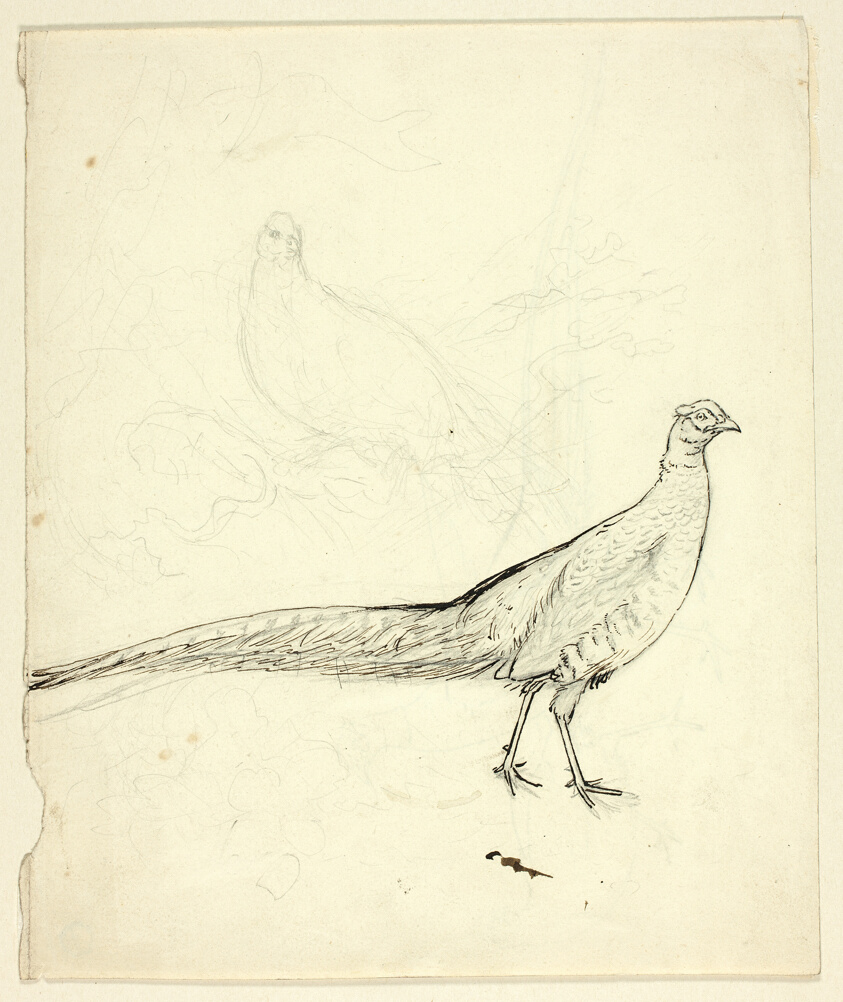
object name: Drawing and Watercolor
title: Two Sketches of Pheasant (recto); Sketch of Pheasants and Female Nude (verso)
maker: Henry Stacy Marks (English, 1829-1898)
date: 1849/98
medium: Pen and brown ink, over graphite (recto and verso), on cream wove paper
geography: England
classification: pen and ink drawings; drawings (visual works); prints and drawing; paper